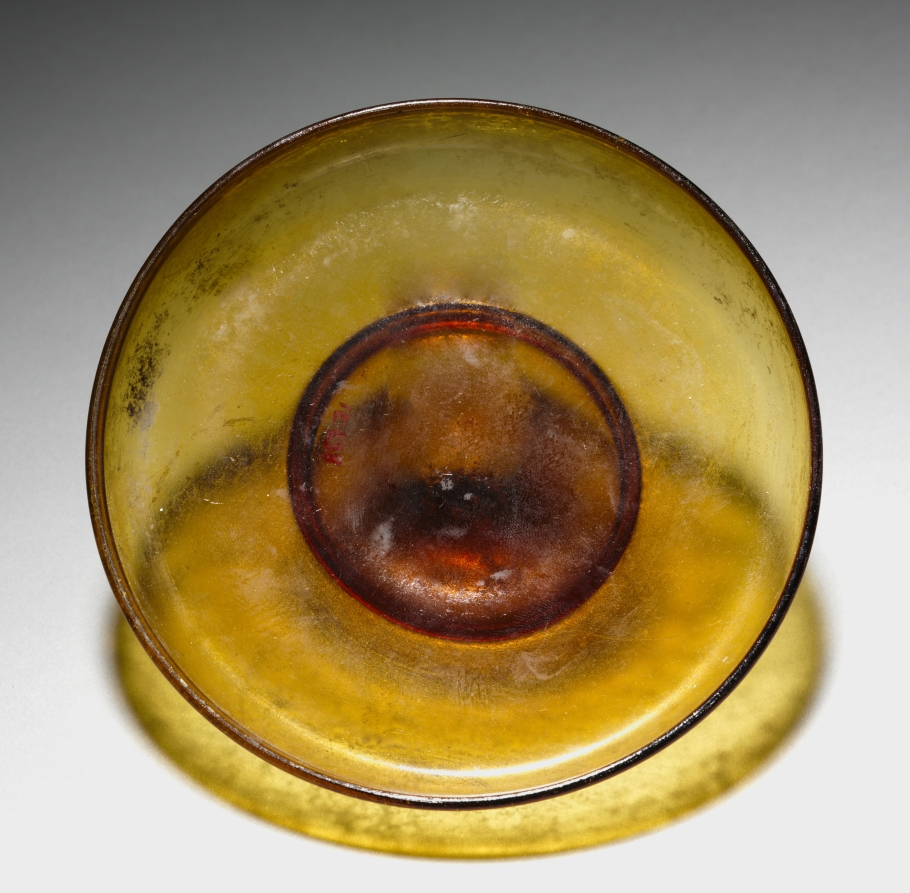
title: Saucer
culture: Eastern Mediterranean, Roman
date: 300s CE or later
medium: glass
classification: Glass